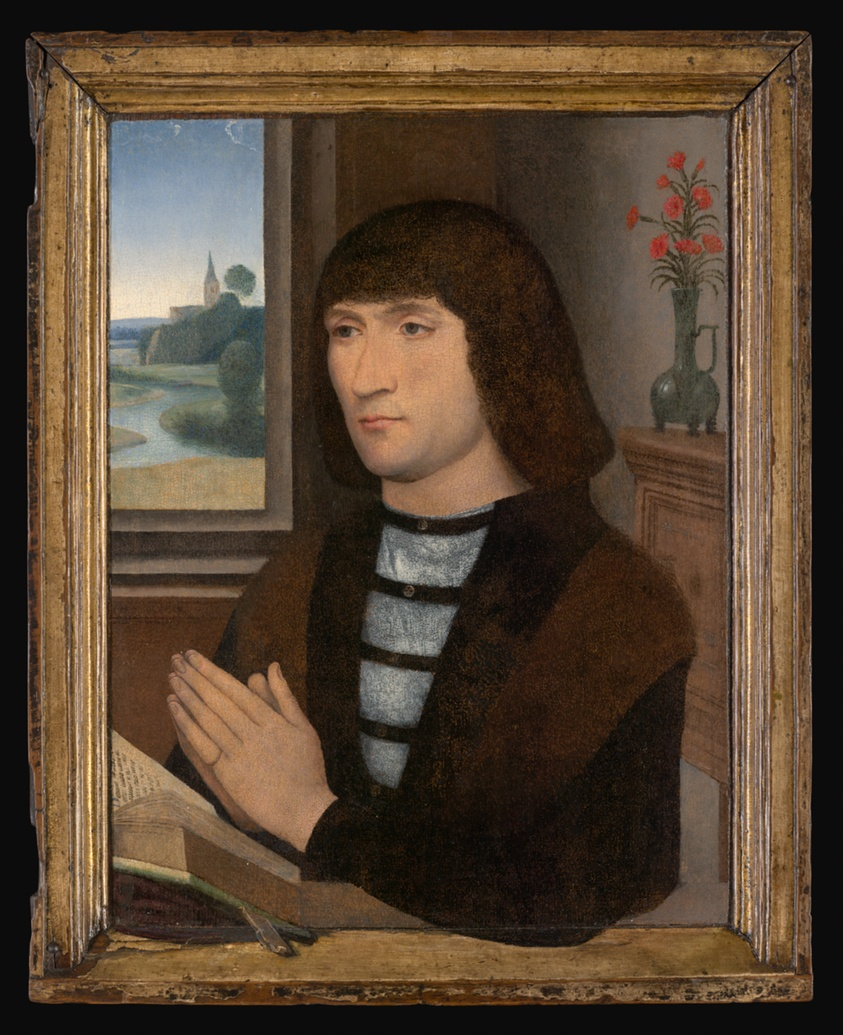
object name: Painting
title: Saint Anthony of Padua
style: 15th century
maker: Hans Memling (Netherlandish, c. 1430–1494)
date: c. 1485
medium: Oil on panel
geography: Netherlands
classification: painting; paint; oil paintings (visual works); oil on panel; european painting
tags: saints, man, cross, babies, children, religion, religious, religious figures, Devotion, bibles, book, Christian subjects, Christianity, religious attire, Jesus, prayer, interior, vase, river, landscape, window